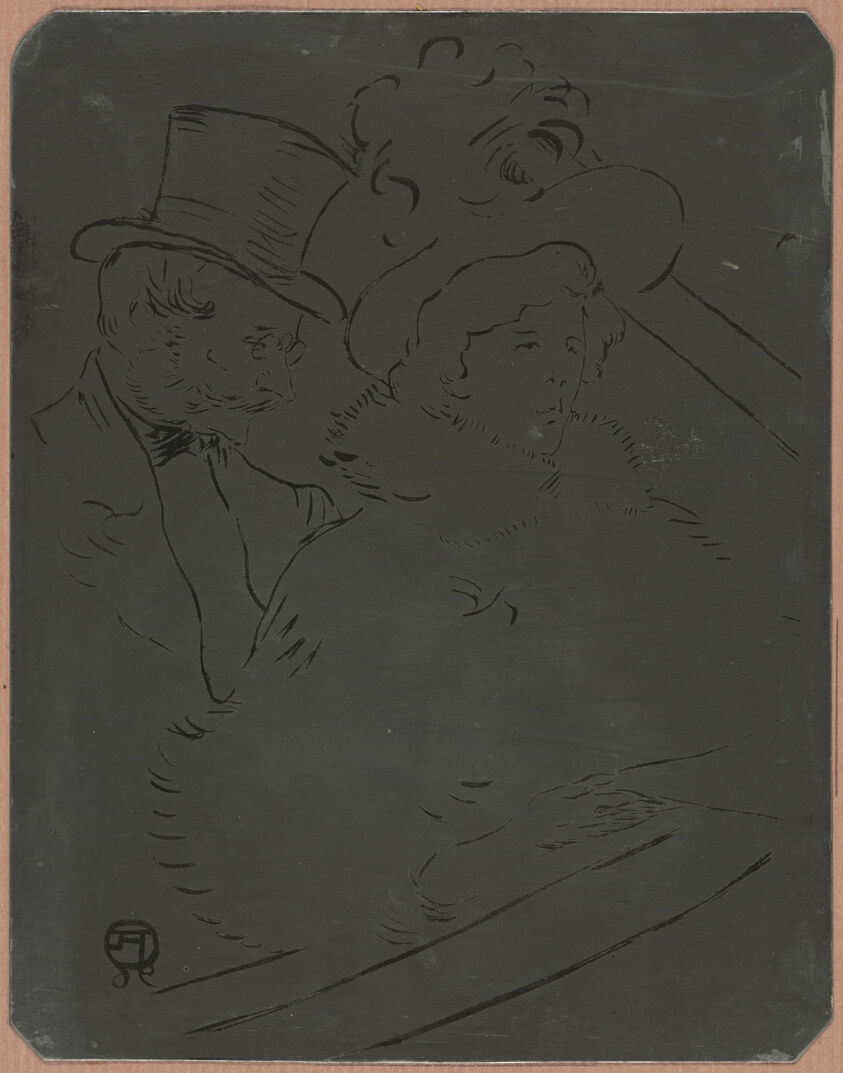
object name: Print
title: At the Concert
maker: Henri de Toulouse-Lautrec (French, 1864-1901)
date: 1896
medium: Zinc lithographic plate with corners removed and beveled edges, laid down on mauve board and taped to mat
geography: France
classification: zincograph; matrix; prints and drawing; print